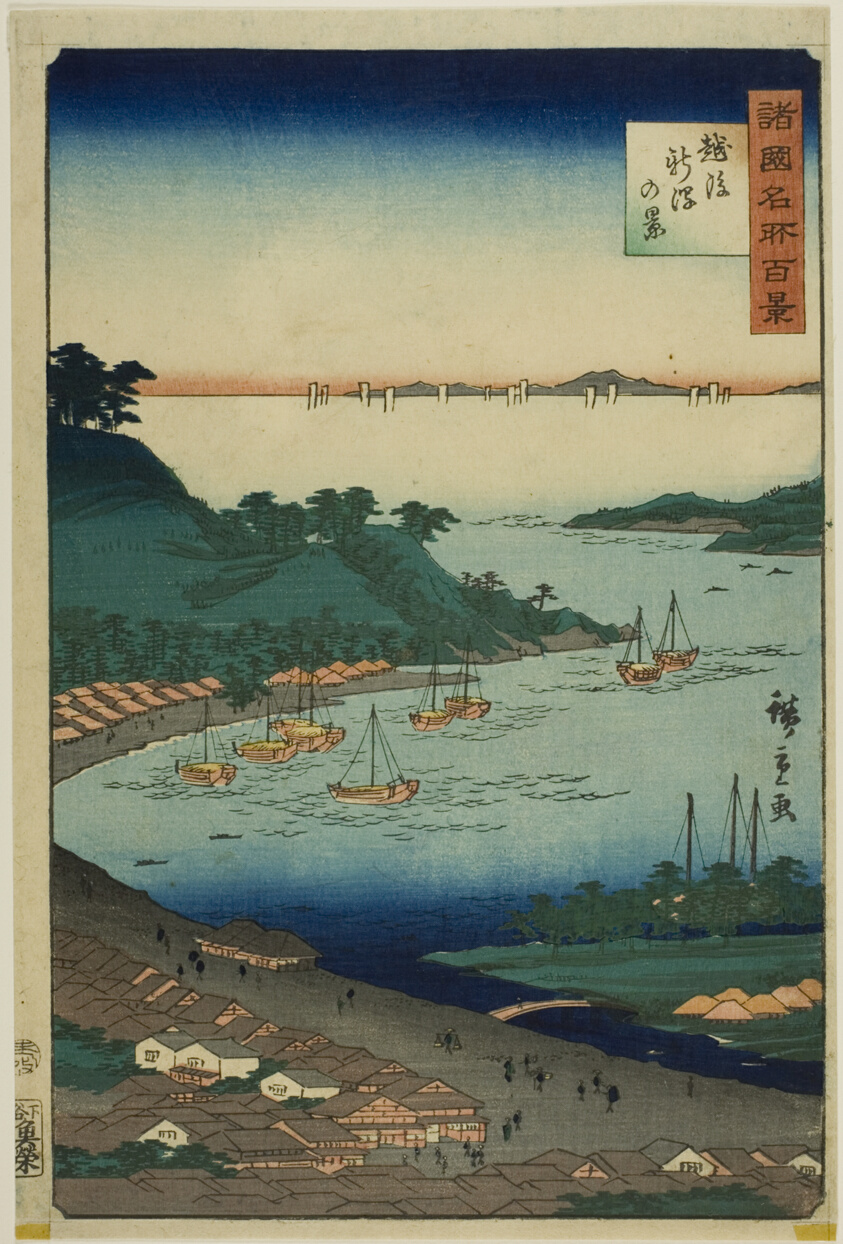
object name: Print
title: View of Niigata, Echigo Province (Echigo Niigata no kei) from the series “One Hundred Famous Views in the Various Provinces (Shokoku meisho hyakkei)”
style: Japanese (culture or style)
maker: Utagawa Hiroshige II (Shigenobu) (Japanese, 1826–1869)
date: 1859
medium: Color woodblock print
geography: Japan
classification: woodblock print; print